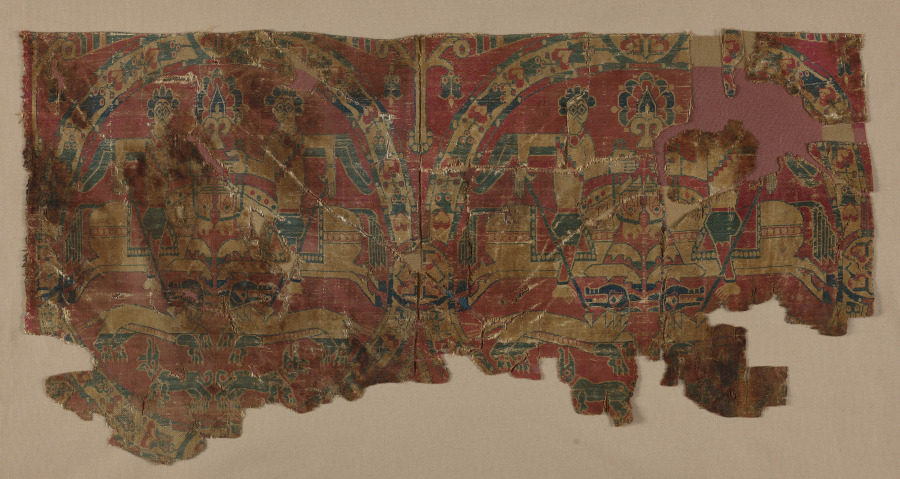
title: Roundels with Hunters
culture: Eastern Iran or Central Asia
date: 800s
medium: Silk: samite weave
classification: Textile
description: This textile consists of two fragments mounted together. They are woven with floral roundels that enclose horsemen hunting lions. The theme of riders hunting with lances, the floral frames of the roundels, and the costumes of the hunters were all inspired by silks from the Byzantine world. The stiff, abstracted style, however, is characteristic of Sogdian silks, woven in Sogdiana in Central Asia and often traded to distant markets. These fragments were preserved in a grave in Egypt where they were found sewn as ornaments onto a tunic.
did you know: This textile consists of two fragments mounted together (CMA 1982.284 and CMA 1959.124).